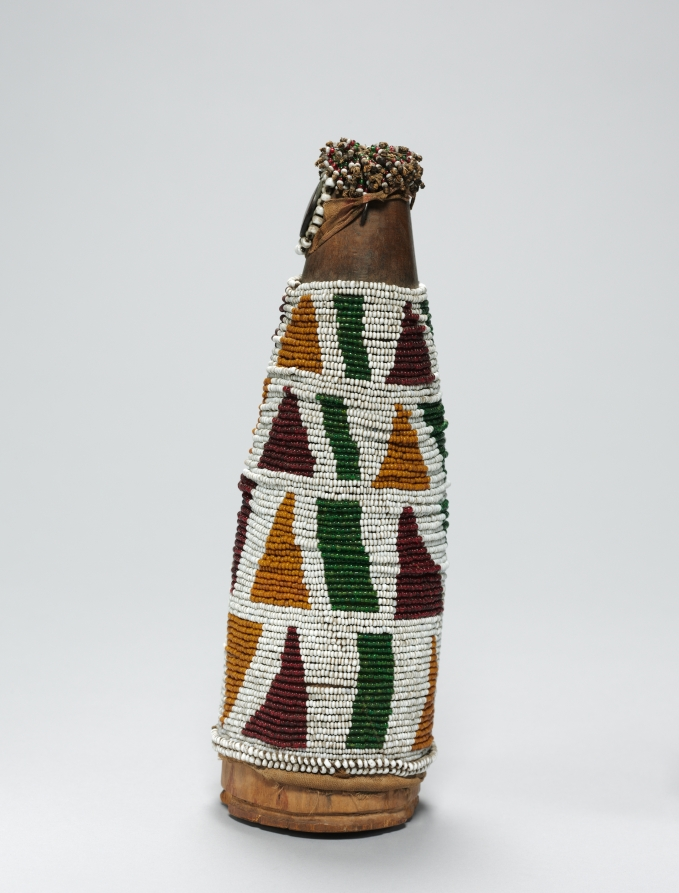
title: Figure (kgöngwana-tshingwana/Ngwana sehô)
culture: Southern Africa, Lesotho, Southern Sotho-style maker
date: 1800s–1900s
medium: Wood, glass beads, cloth, thread, and copper alloy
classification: Sculpture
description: Fertility figures like these were used during the initiation ceremonies of pubescent girls. Integrating talismanic materials in their fabrication, the figures were meant to guarantee fertility and prevent or cure barrenness—a gourd’s womblike shape and the seeds within symbolize fecundity. They are sometimes also called “child figures” because a young bride would care for them as she would for her future children, carrying them on her back and sleeping with them until her first child was born.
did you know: These figures were symbolic infants that recently married women would take care of until their first child was born.